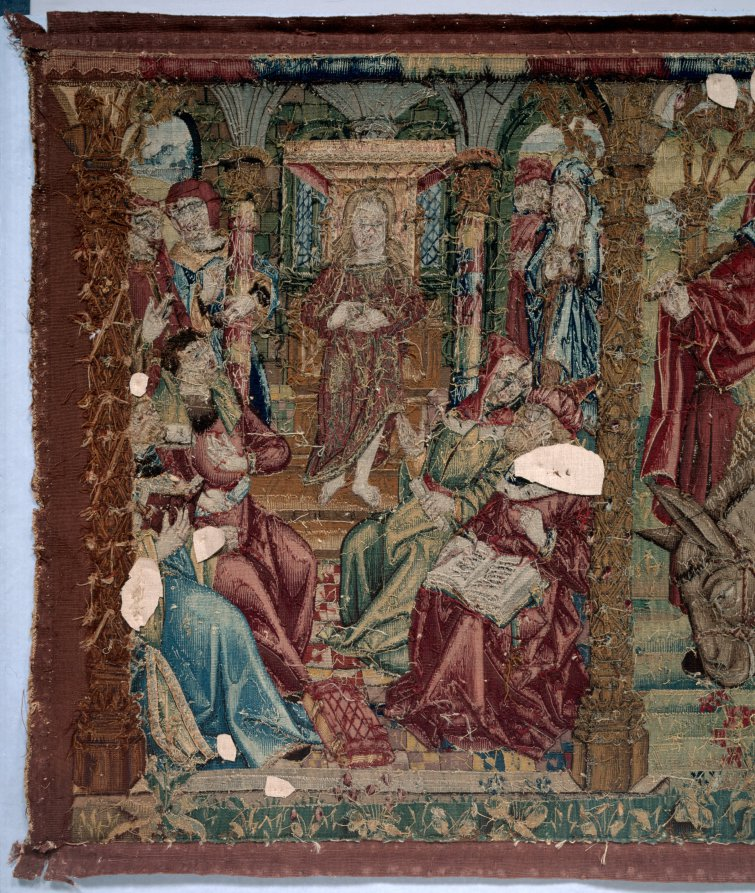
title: Altar Frontal: Scenes from the Childhood of Christ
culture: France and South Netherlands, 1500s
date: c. 1500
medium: Wool, silk, gold thread; tapestry weave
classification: Tapestry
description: Pictorial tapestries were symbols of wealth and more highly prized than paintings. Small tapestries with Christian imagery were frequently commissioned to embellish the fronts of altars. This example displays the Massacre of the Innocents, the Flight into Egypt, and Christ among the Doctors. Tapestry weave is ideal for creating narrative scenes. The technique can be compared to painting, as each colored weft (horizontal thread) is interlaced with warps (vertical thread) where needed for the pattern. As expensive investments, tapestries have the advantage of being portable and easily stored and displayed.